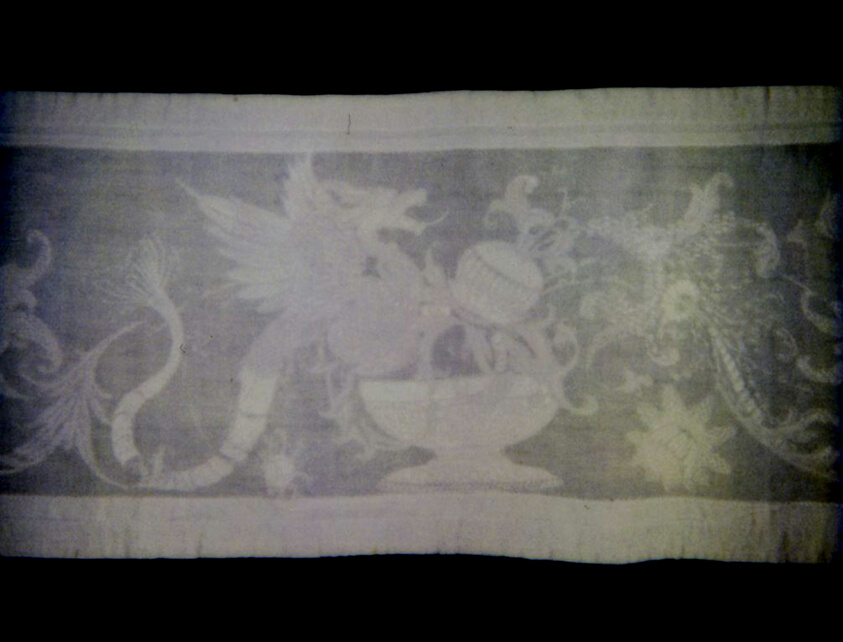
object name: Textile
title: Runner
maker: Switzerland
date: Possibly 18th century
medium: Linen, plain weave; embroidered with linen in back, buttonhole, double stitch, double feather, feather, hem, herringbone, satin, and stem stitches; laid work and couching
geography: Switzerland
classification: textile; needlework (visual works)